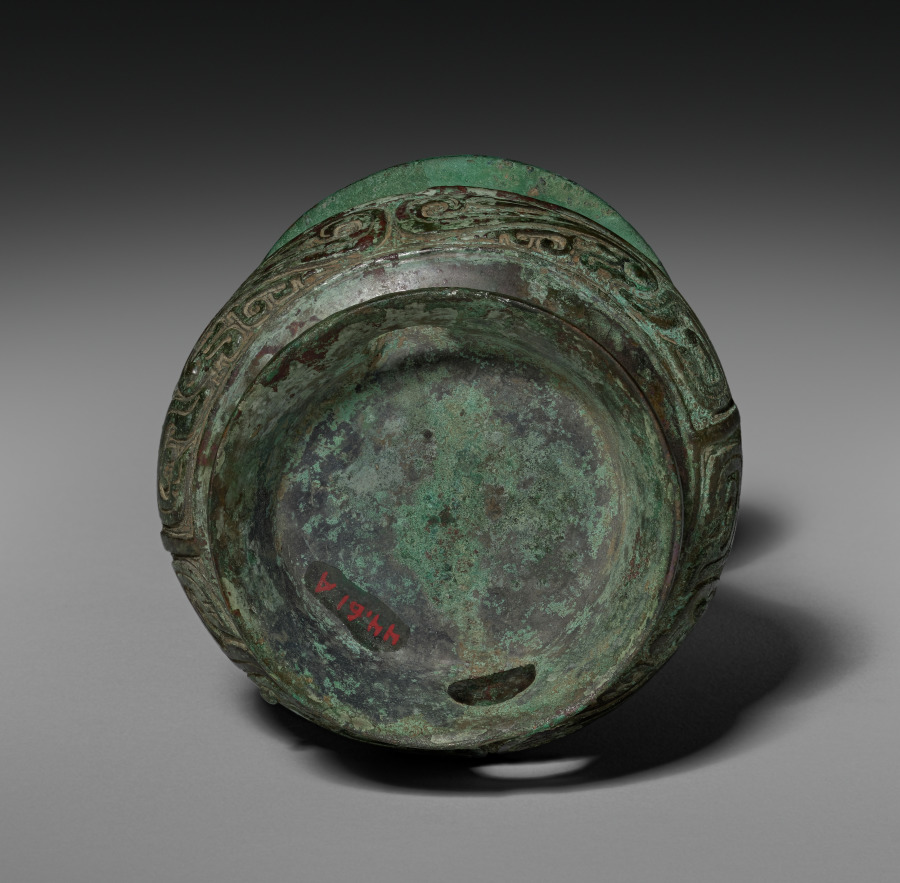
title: Wine Vessel (Hu) (lid)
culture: China, Western Zhou dynasty (c. 1046–771 BCE)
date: c. 1000–900 BCE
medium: bronze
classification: Metalwork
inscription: inscription inside top (cup): 事从作壺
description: This tall, slender bronze wine vessel, called a hu, has three bands of ornamentation: one above the foot, one around the neck, and one on the cover. Stylized birds or phoenixes are in the band around the neck, while the band on the cover and foot feature geometric dragons. The dragon and the phoenix may represent the Yin and Yang and would be equally appropriate on a bronze of either secular or religious purposes. It likely held liquids like wine at festive banquets or religious ceremonies.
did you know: When inverted, the cover forms a cup.